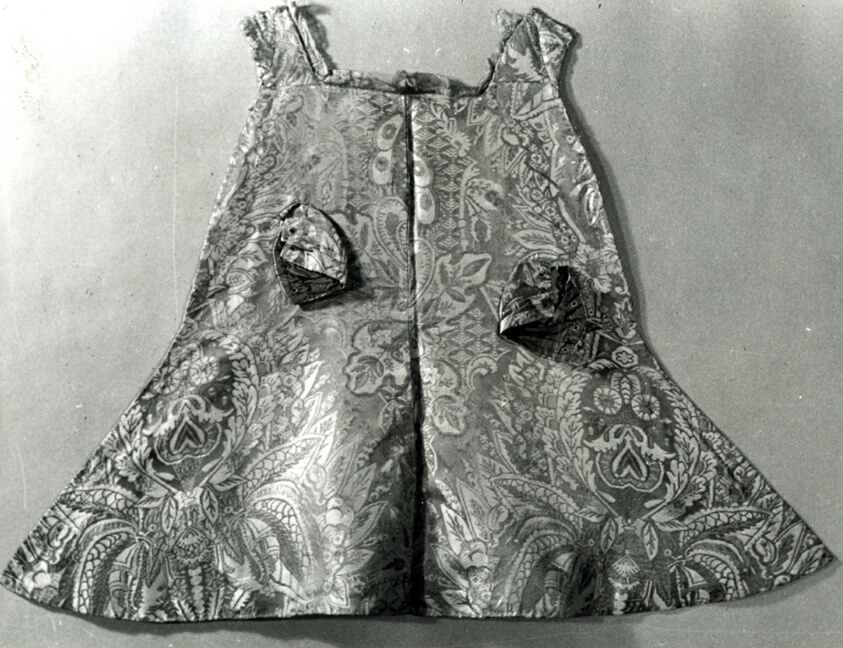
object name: Textile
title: Two Panels and Two Fragments from an Image Robe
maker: France (robe made in Spain or Italy, possibly much later)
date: c. 1729/30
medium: Silk, warp-float faced 7:1 satin weave with supplementary binding warps tying some self-patterning ground wefts in plain interlacing; fragmentary selvages present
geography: France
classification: textile; costume; weaving; liturgical